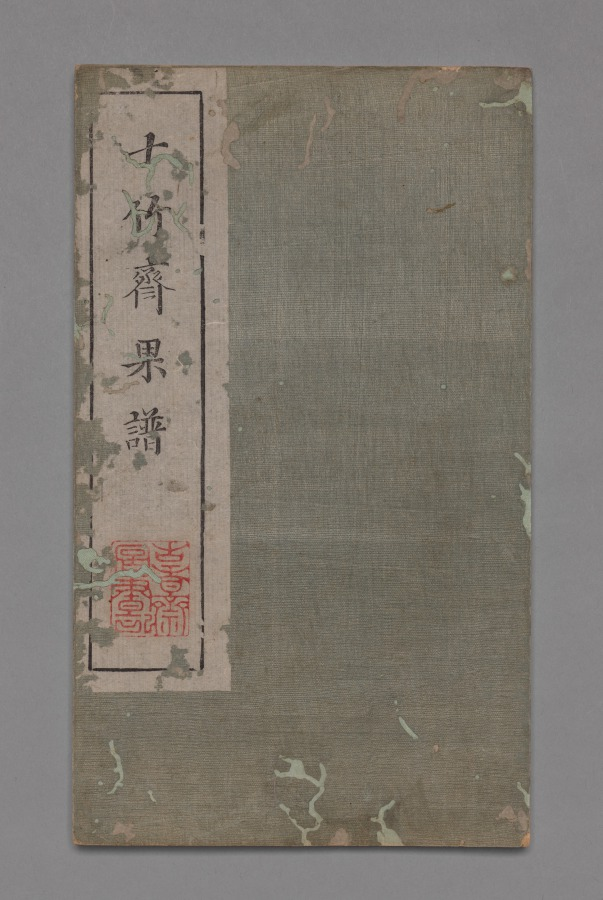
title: Ten Bamboo Studio Painting and Calligraphy Handbook (Shizhuzhai shuhua pu): Fruit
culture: China, Qing dynasty (1644-1911)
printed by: Hu Zhengyan (Chinese, c. 1584–1674)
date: 1633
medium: Woodblock-printed book; ink and colors on paper; first edition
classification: Print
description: Color printing reached a level of perfection in the early 1600s, as seen in this Ten Bamboo Studio Collection of Calligraphy and Painting and the Mustard Seed Garden Manual of Painting (printed 1679 and 1701). The painterly quality, precision in registering (aligning) the woodblocks, and harmonious colors made them the most successful color print editions in Chinese history. Both editions were printed and compiled in Nanjing, spread nationwide, and had a great impact on the arts in Japan and Korea.